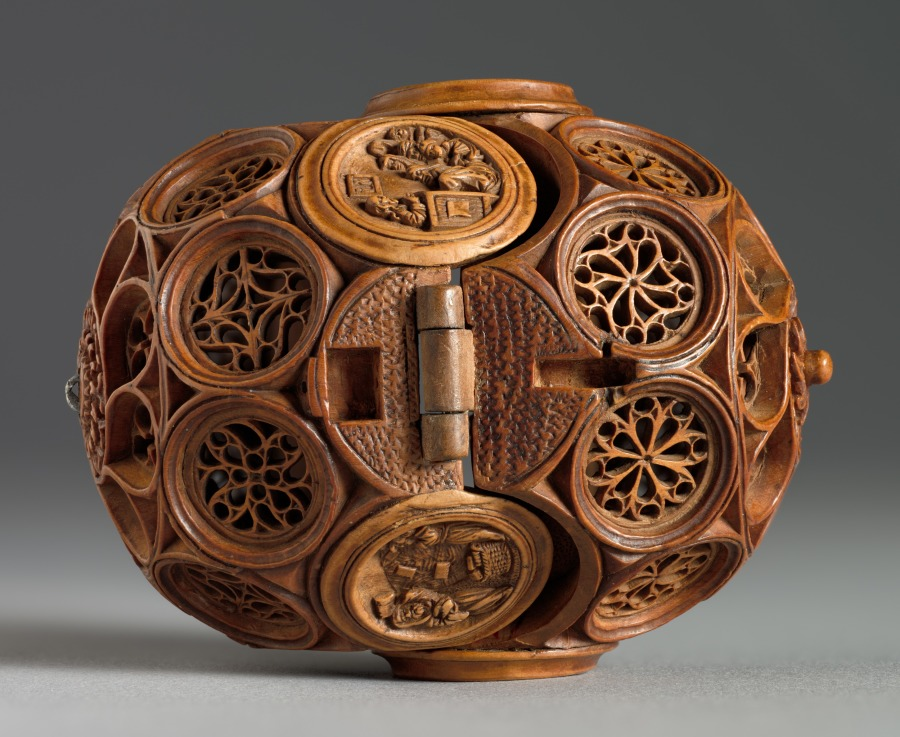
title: Prayer Nut with Scenes from the Life of St. James the Greater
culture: Northern Netherlands (Holland)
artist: Adam Dircksz (Netherlandish, active c. 1500)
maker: and Workshop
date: c. 1500–1530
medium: boxwood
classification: Sculpture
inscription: Interior around lower half: SANCTVS SACRILEGI STAT IVDICIS ANTE TRIBVNAL (Holiness stands before the throne of the profane judge)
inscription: Interior, around upper half: GAVDENS PRO CRISTO IACOBVS SVBDIT CAPVT ENSI (St James submits his head to the sword)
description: Prayer nuts are capsules that can be opened in half and were mainly worn from the end of the 1400s until 1530, particularly in the Netherlands. These objects are generally made from boxwood and carved with extreme refinement and delicacy. They often echo Gothic architecture and include openwork tracery or elaborate decorative patterns. Prayer nuts came into fashion for private devotion as a pendant on the rosary or on a decorative chain. The emergence of prayer nuts went hand in hand with the practice of praying the rosary more frequently at the end of the Middle Ages.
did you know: This miniature masterpiece was held and caressed within the palm of the holder as they prayed and meditated on their faith. What do you use to focus or engage in quiet concentration?